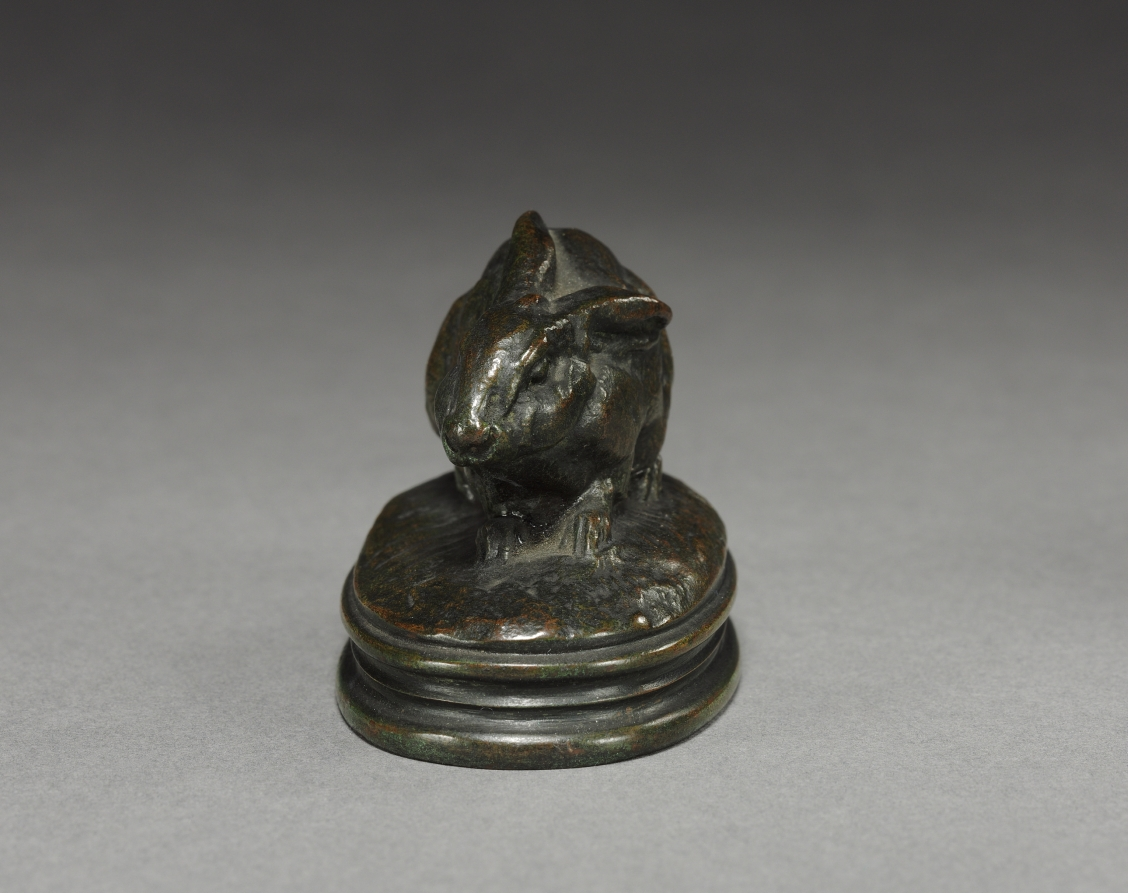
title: Hare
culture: France, 19th century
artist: Antoine-Louis Barye (French, 1796–1875)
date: c. 1830 – 1875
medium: bronze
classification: Sculpture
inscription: Signed on base top rear: "Barye"